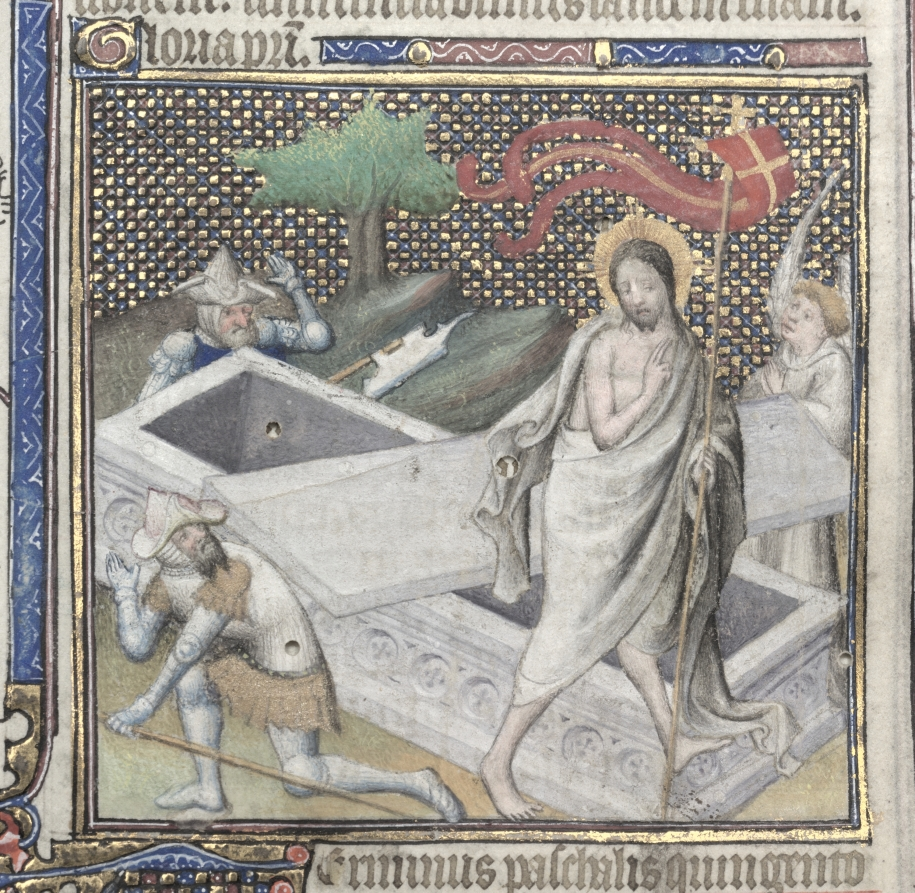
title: The Gotha Missal: Fol. 1r, Trinity and Resurrection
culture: France, Paris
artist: Master of the Boqueteaux (French)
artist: and Workshop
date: c. 1375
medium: ink, tempera, and gold on vellum; blind-tooled leather binding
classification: Bound Volume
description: The style and quality of this manuscript's decoration is typical of deluxe Parisian books made for aristocratic or royal patrons. Most of the book's decoration appears to be the work of the Master of the Boqueteaux, an artist active at the court of King Charles V (died 1380). His style was apparently shared by a number of book illuminators working in and around Paris. It is very possible that the Gotha Missal belonged to Charles V, but is not provable because the manuscript has no royal portraits and lacks a colophon. Given the book's magnificent decoration, however, it would seem that it was produced for a Valois prince, if not for the king himself. The manuscript receives its name from the German dukes of Gotha, its later owners.